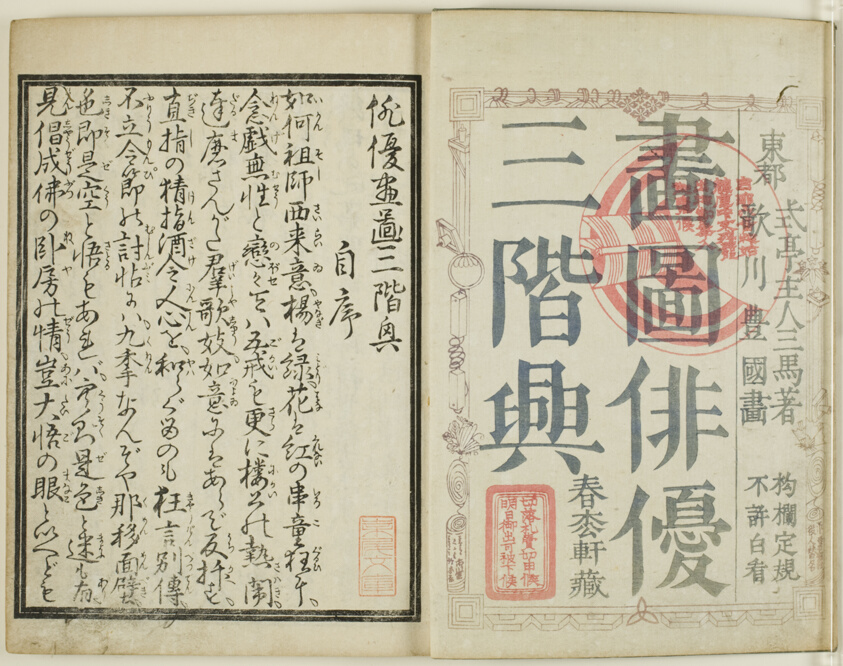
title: Yakusha Sangai Kyo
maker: Utagawa Toyokuni I (Japanese, 1769–1825)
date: 1801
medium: Book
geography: Japan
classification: book; asian art